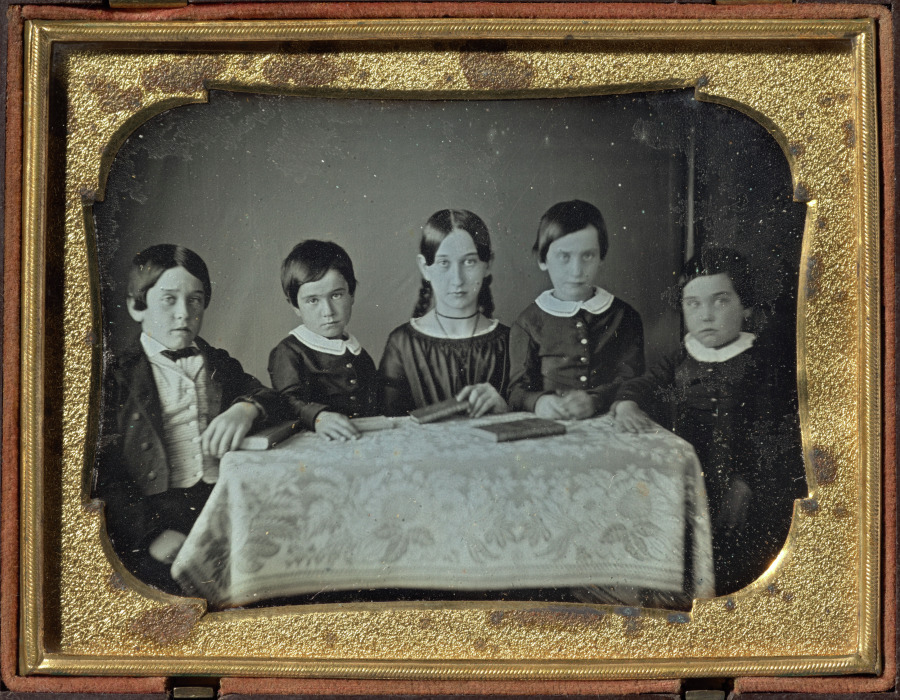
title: The Homework Table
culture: America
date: c. 1858–60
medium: daguerreotype, quarter plate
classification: Photograph